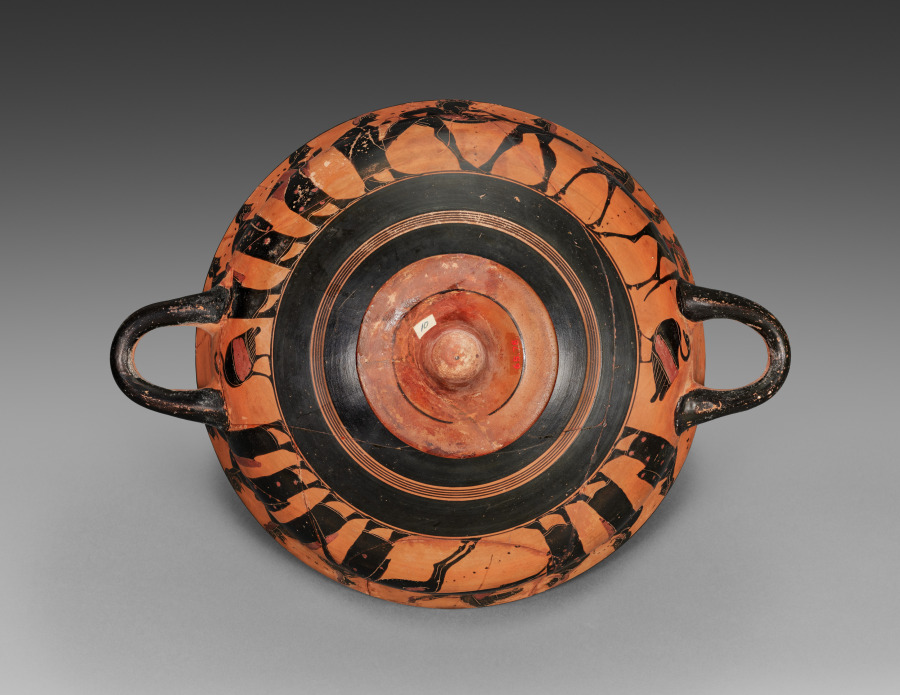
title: Siana Cup (Black-Figure Kylix [Drinking Cup]): Horseman and Warriors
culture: Greek, Attic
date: 575–550 BCE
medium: ceramic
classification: Ceramic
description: Two kneeling warriors do battle in the tondo of this large drinking cup, red blood streaming from their wounded legs. Without labels or attributes, their identities remain uncertain—perhaps Eteokles and Polyneikes, the cursed sons of Oedipus. The exterior figures are anonymous, although many are accompanied by small dots probably meant to imitate letters (for identifying inscriptions). On one side, a warrior is greeted by a nude youth holding a garland, with a horseman, a flying eagle, and several men observing. On the other, a bearded man rides a rearing horse, flanked by six draped men. Waterbirds stand beneath the handles.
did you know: Siana cups take their name from a cemetery in Rhodes where many were first found.